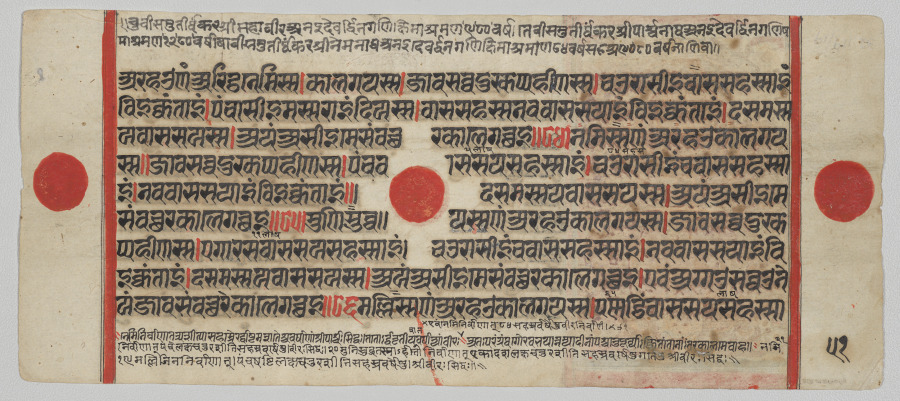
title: Text, Folio 51 (verso), from a Kalpa-sutra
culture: Western India, Gujarat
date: c. 1475–1500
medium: Gum tempera, ink, and gold on paper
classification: Painting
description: Nemi, who was the cousin of the Hindu god Krishna, lived in the ancient mythic past. Like every other Jina, after achieving enlightenment he gave a mystical teaching to all the gods and animals and appeared to the assembly simultaneously in all directions. This exposition of Jain teachings is depicted by the circular diagram with Nemi seated in the center. The crescent moon under the seated figure of Nemi at the top of the page reveals that he is depicted in the realm of liberation, above the world of birth and death, in eternal meditative bliss.